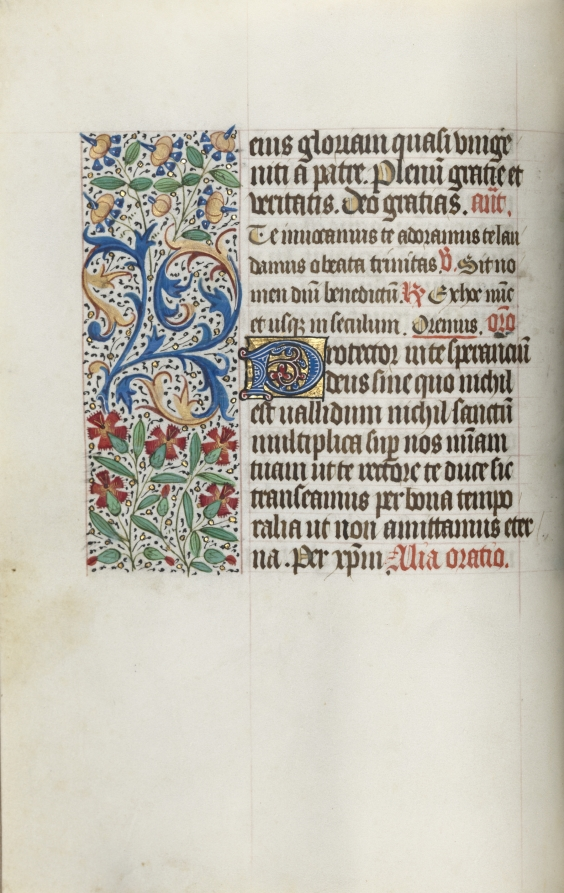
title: Book of Hours (Use of Rouen): fol. 14v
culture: France, Rouen, 15th century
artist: Master of the Geneva Latini (French, active Rouen, 1460–80)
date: c. 1470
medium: ink, tempera, and gold on vellum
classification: Bound Volume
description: In the late 1400s and early 1500s Rouen was an established and important center of book production. The city’s cathedral had a wealthy chapter that spent large sums of money to commission books and to maintain its extensive library. The stationers and booksellers would have likely been concentrated in or near the cathedral precinct. This artist, named after a manuscript now in Geneva, was Rouen’s principal illuminator during the second half of the 1400s.